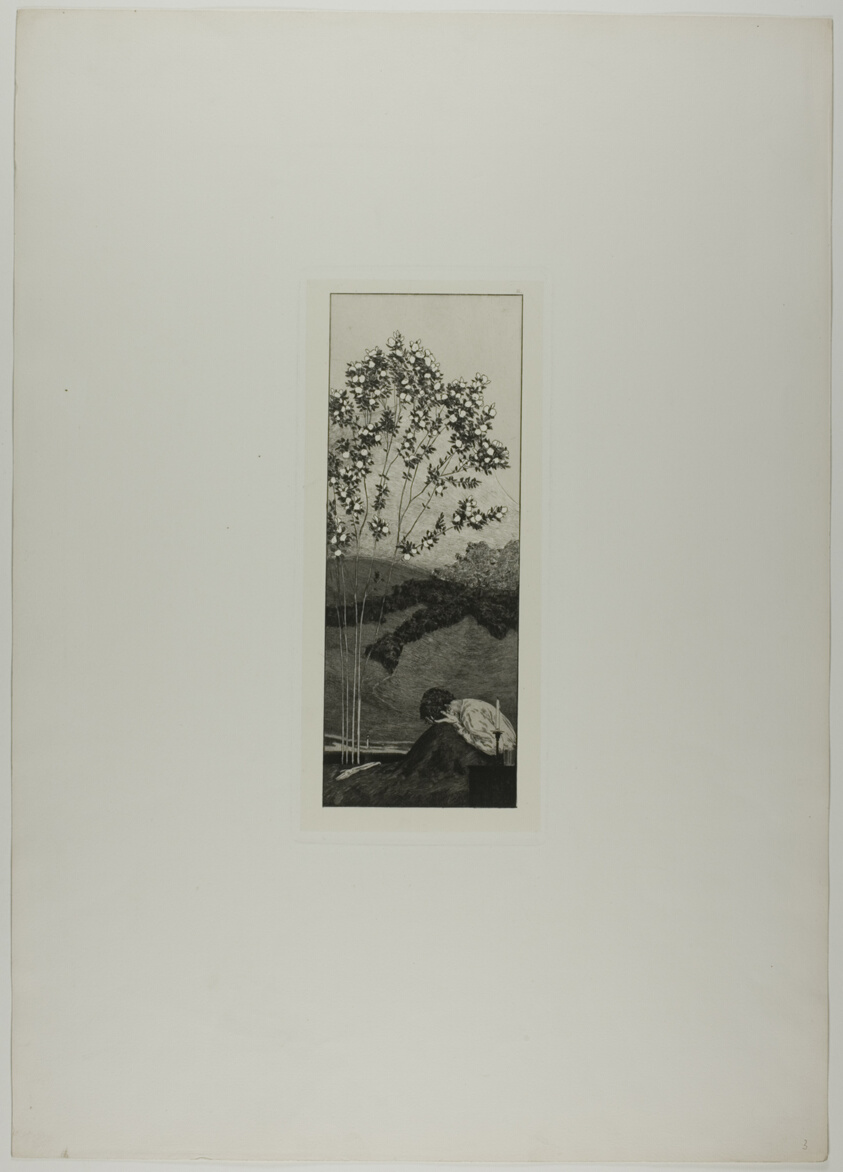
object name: Print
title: Wishes, plate three from A Glove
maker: Max Klinger (German, 1857-1920)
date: 1881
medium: Etching and aquatint on ivory chine collé on off-white wove paper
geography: Germany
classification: etching; print; prints and drawing